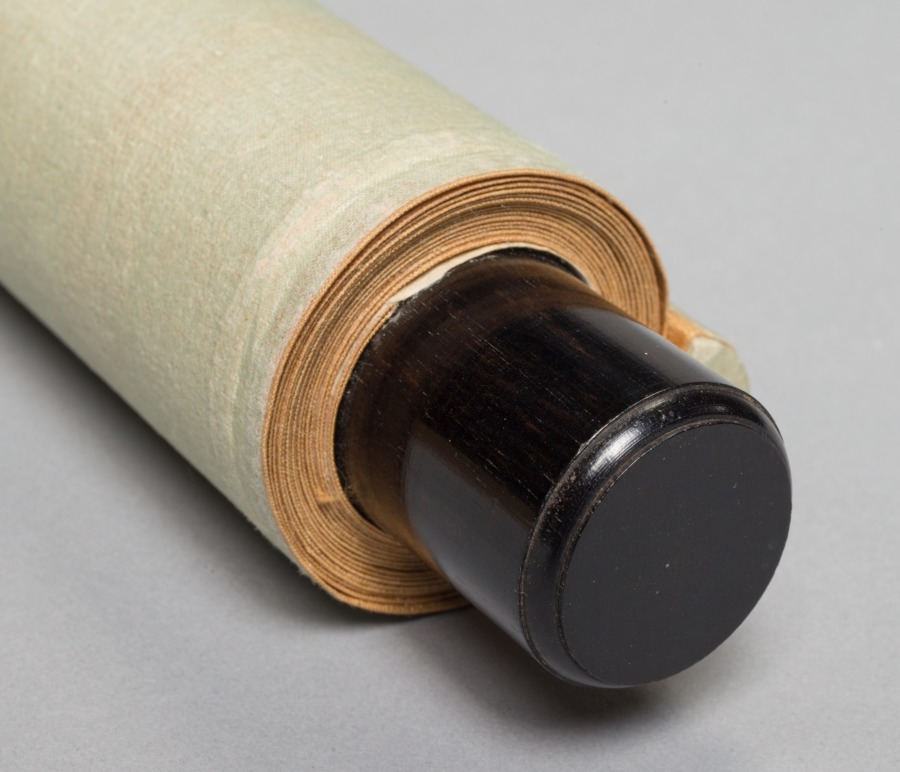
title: Landscape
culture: Japan, Edo period (1615–1868)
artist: Gion Nankai (Japanese, 1677–1751)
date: c. 1700–1751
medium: hanging scroll; ink and color on paper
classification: Painting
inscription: artist's inscription, signature and two seals at upper right corner.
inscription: The mountain pavilion is desolate, visitors are rare./ Mud patches the brushwood gate; leaves patch my clothes./ Rising not from the bamboo bed, my head like snow./ Already without intent, I abandon questions of Zen.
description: A teacher of Confucian ethics, the Chinese philosophical system focused on social harmony and familial responsibility, Gion Nankai was also a painter. Ike Taiga (池大雅) (1723–1776) was among his students. Nankai inscribed this landscape with one of 24 poems for painting subjects composed by the scholar and painter Tang Yin (唐寅) (Chinese, 1470–1524). It reads as follows: The mountain pavilion is desolate, visitors are rare. Mud patches the brushwood gate; leaves patch my clothes. Rising not from the bamboo bed, my head like snow. Already without intent, I abandon questions of Zen.